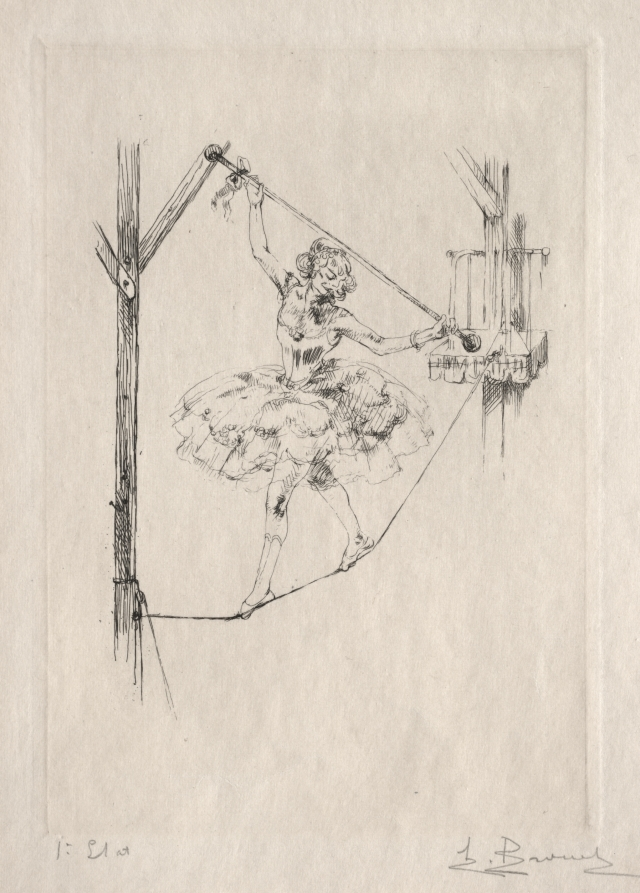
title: Tightrope Dancer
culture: France, 20th century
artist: Auguste Brouet (French, 1872–1941)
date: c. 1902–41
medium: etching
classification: Print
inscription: signed in pencil, lower right: A Brouet; in pencil, lower left: 1 etat